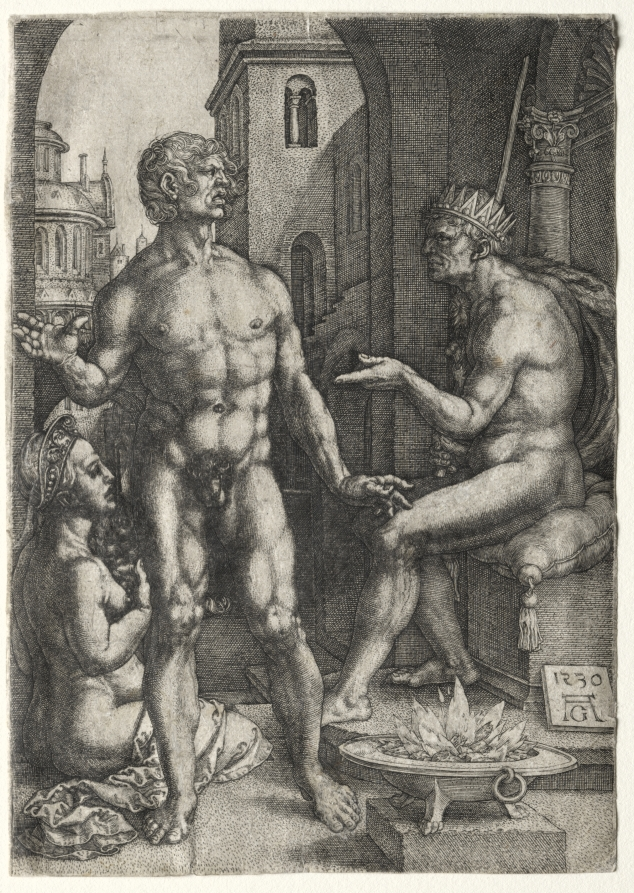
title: Mucius Saevola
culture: Germany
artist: Heinrich Aldegrever (German, 1502–1555/61)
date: 1530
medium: engraving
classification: Print